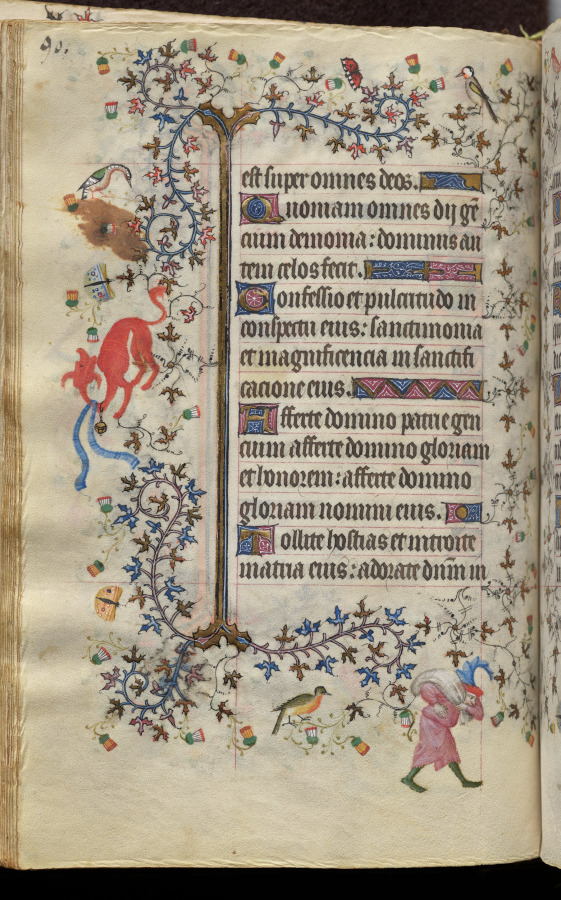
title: Hours of Charles the Noble, King of Navarre (1361-1425): fol. 45v, Text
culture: France, Paris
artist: Master of the Brussels Initials and Associates (French)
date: c. 1405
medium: ink, tempera, and gold on vellum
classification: Bound Volume